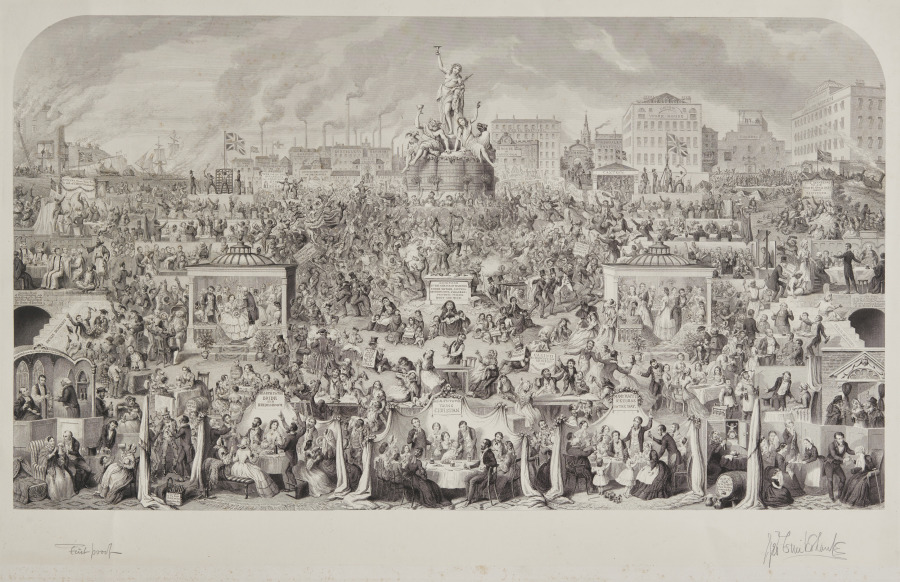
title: The Drinking Customs of Society or Worship of Bacchus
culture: England, 19th century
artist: George Cruikshank (British, 1792–1878)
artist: and Charles Mottram (British, 1807–1876)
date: 1864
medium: steel engraving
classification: Print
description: Made during the Victorian era in England (1837–1901), this grandly scaled print utilizes the imagery of a Roman bacchanalia—an ancient wine-fueled festival dedicated to Bacchus—to convey a frenzy of activities related to alcohol and its role in society. Bacchus, Silenus (his teacher), and a bacchant (a follower) appear as sculptures in the center, while widows and orphans, whose husbands and fathers have succumbed to alcohol, appear below. Foreground vignettes featuring a religious service, social gathering, marriage feast, christening, birthday party, and funeral demonstrate alcohol’s ubiquity in middle-class society. George Cruikshank was part of a movement in England that promoted moderation—or even complete abstinence—in the consumption of alcohol.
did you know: Gin became available in England in the early 1700s. Unlike more expensive spirits, gin was popular with people of all classes, leading to a moral panic that persisted throughout the 1800s.